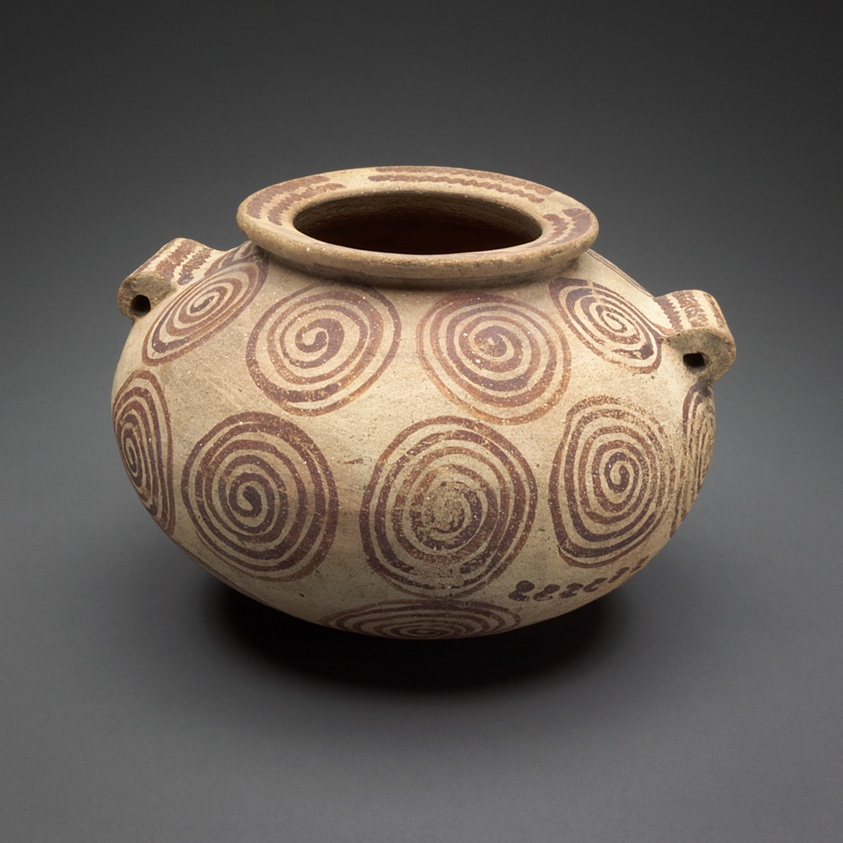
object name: Vessel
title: Jar with Painted Decoration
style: predynastic, gerzean, ancient, egyptian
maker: Egyptian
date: Predynastic Period, Naqada II (about 3500–3200 BCE)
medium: Ceramic and pigment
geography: Egypt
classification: jars; ceramics; vessel; ancient art; container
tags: containers, dining, drinking